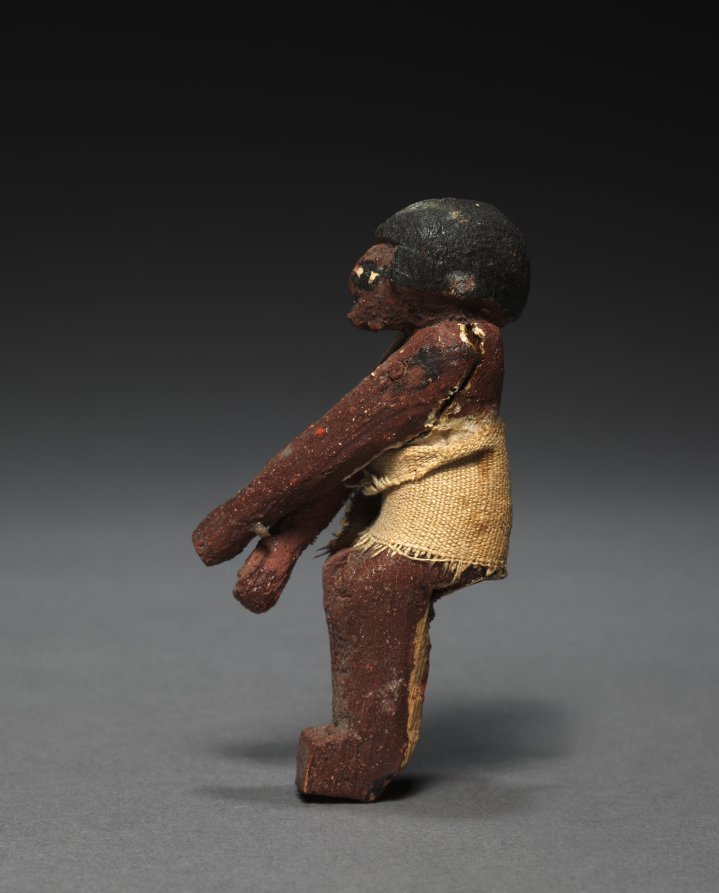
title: Seated Model Sailor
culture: Egypt, Middle Kingdom (2040–1648 BCE), Dynasties 11–12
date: c. 2000–1000 BCE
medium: painted sycamore fig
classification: Funerary Equipment